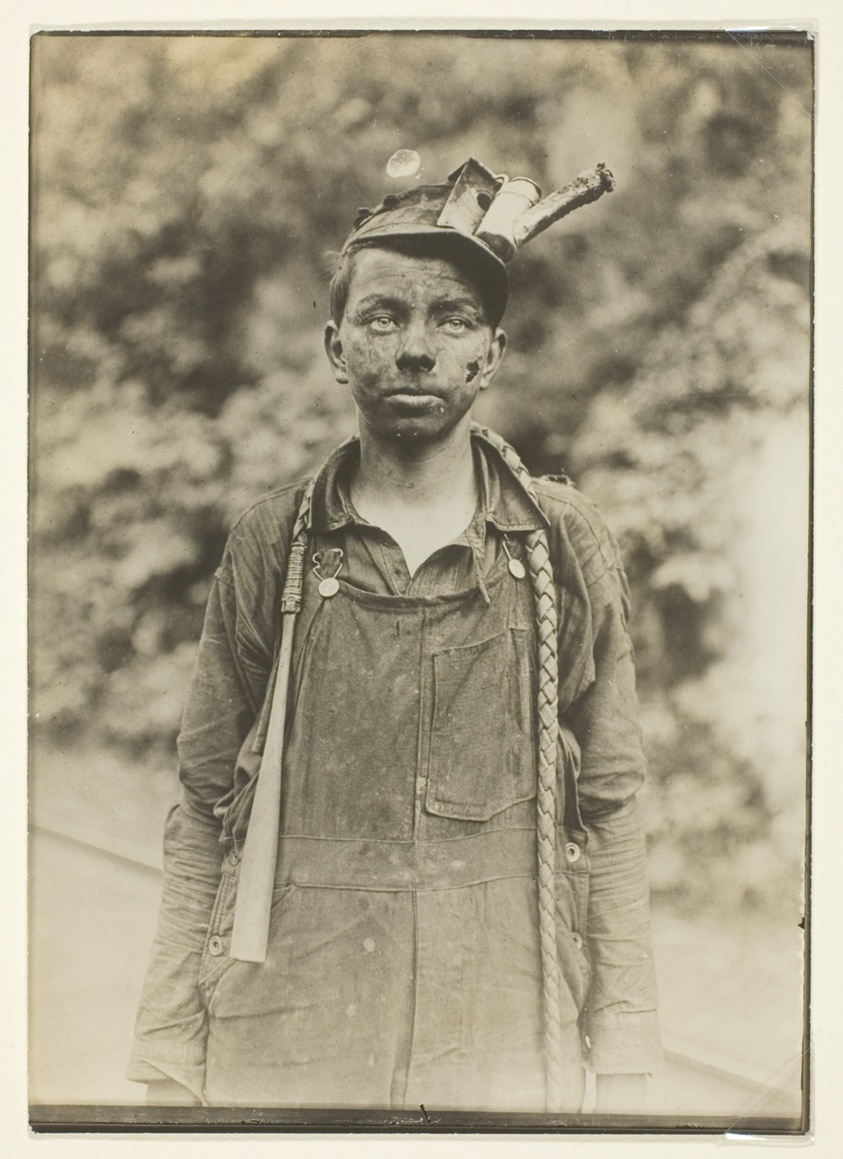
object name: Photograph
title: West Virgina, Driver, Hours 7 a.m. to 5:30 p.m.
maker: Lewis Wickes Hine (American, 1874–1940)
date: 1909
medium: Gelatin silver print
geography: United States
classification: gelatin silver (developing-out-paper) pr; photographic process; photography; photograph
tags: Collected by Hugh Edwards, documentary